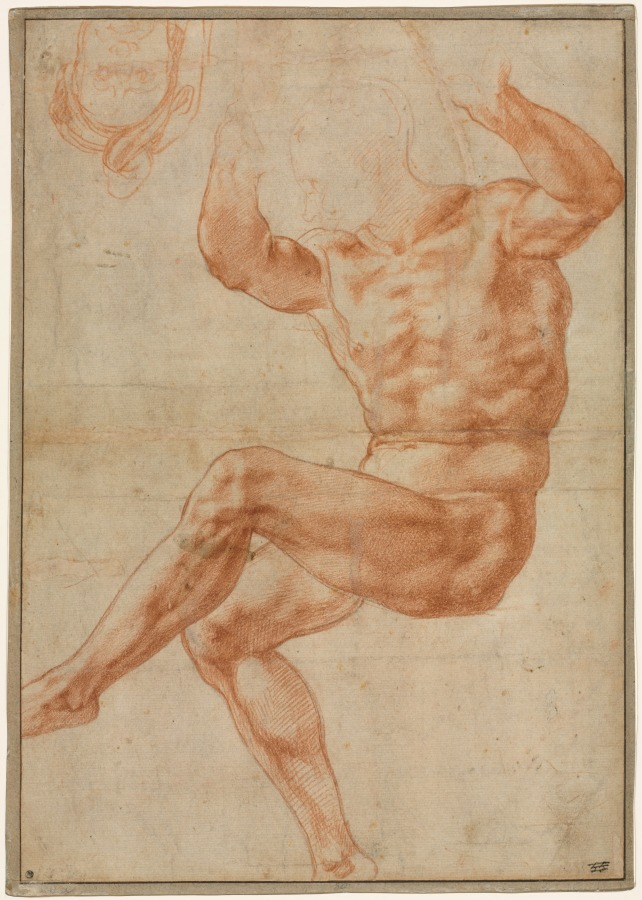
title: Study for the Nude Youth over the Prophet Daniel (recto)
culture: Italy, 16th century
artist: Michelangelo Buonarroti (Italian, 1475–1564)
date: 1510–1511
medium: red chalk over black chalk or charcoal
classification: Drawing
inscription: lower right, in brown ink: 55 [crossed out]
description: Universally considered one of the greatest artists of the Italian Renaissance, Michelangelo devoted four years to painting the vast ceiling fresco in the Sistine Chapel. This preparatory study portrays one of the 20 athletic male nudes, known as ignudi, who serve as supporting figures at each corner of the Old Testament scenes painted down the center of the ceiling. Michelangelo worked out the positioning of the ignudi in red chalk drawings before beginning to paint each section of wet plaster. The energy and monumentality of the figure in red chalk, whose body extends beyond the sheet, suggests the heroic athleticism of Michelangelo’s sculpture.